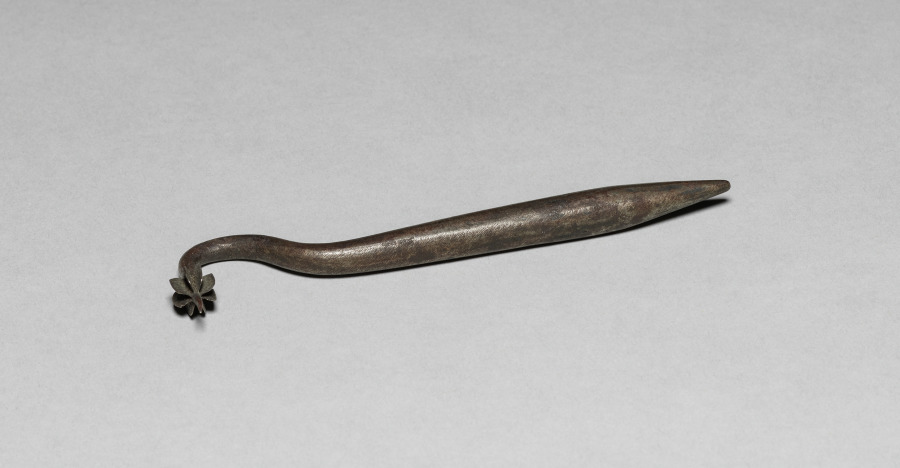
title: Straw Splitting Tool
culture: England, early 19th century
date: early 19th century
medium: iron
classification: Tool